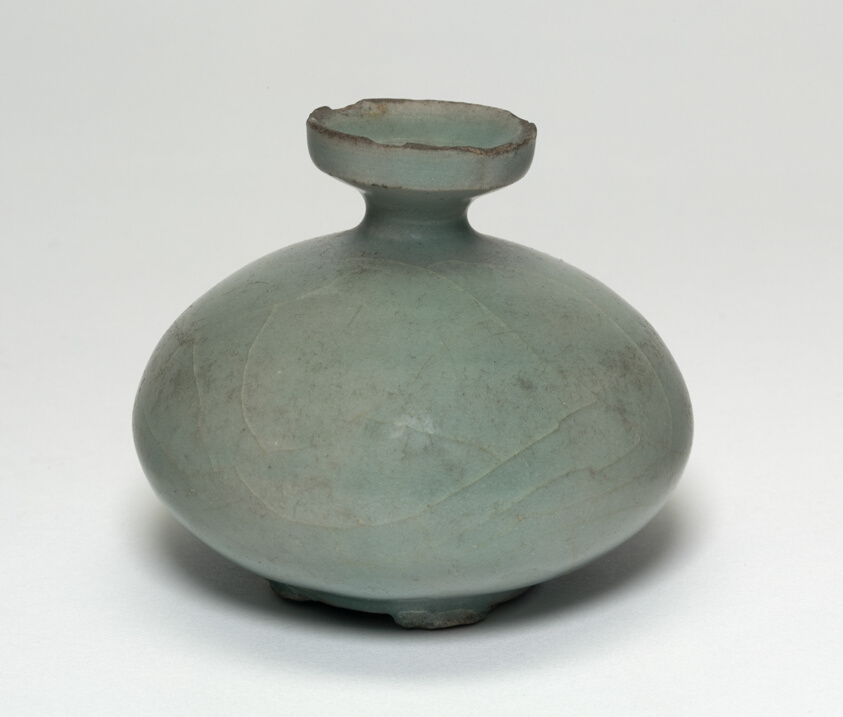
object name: Vessel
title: Oil Bottle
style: Korean (culture or style)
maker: Korea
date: Goryeo dynasty (918–1392), early 12th century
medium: Celadon-glazed stoneware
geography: Korea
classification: ceramics; asian art; vessel